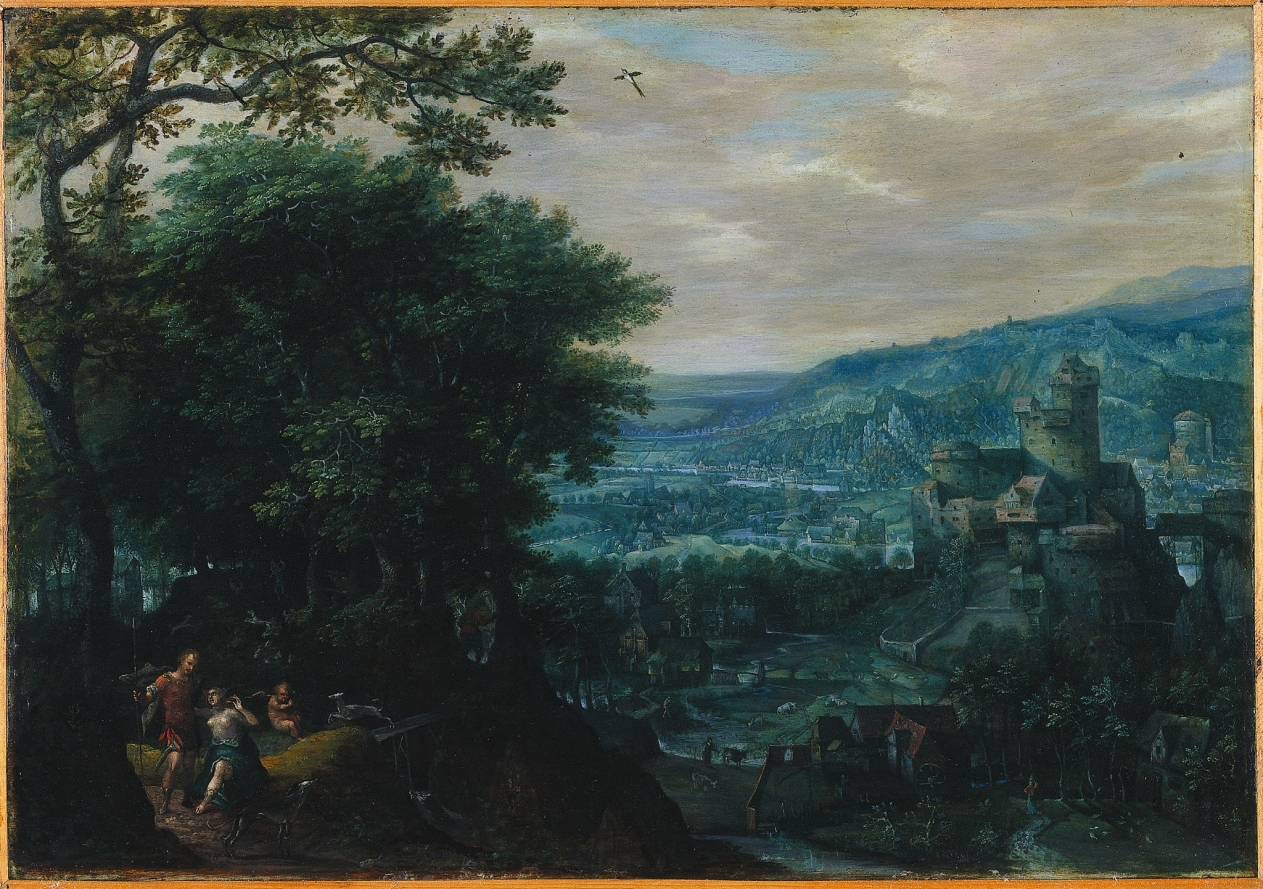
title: Landscape with Venus and Adonis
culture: Netherlands, 16th century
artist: Gillis van Coninxloo (Netherlandish, 1544–1607)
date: 1580s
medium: oil on copper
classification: Painting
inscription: Signed lower left: "GLVC [monogram]"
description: Venus, the goddess of love, is unsuccessful in dissuading her mortal lover Adonis from hunting the boar that would eventually kill him. The artist nestles this story in the foreground of an expansive view with Germanic architecture, rather than a classical setting. Woodlands were relatively new subjects in European painting and this work points toward the full-blown forested landscapes of the 1600s.